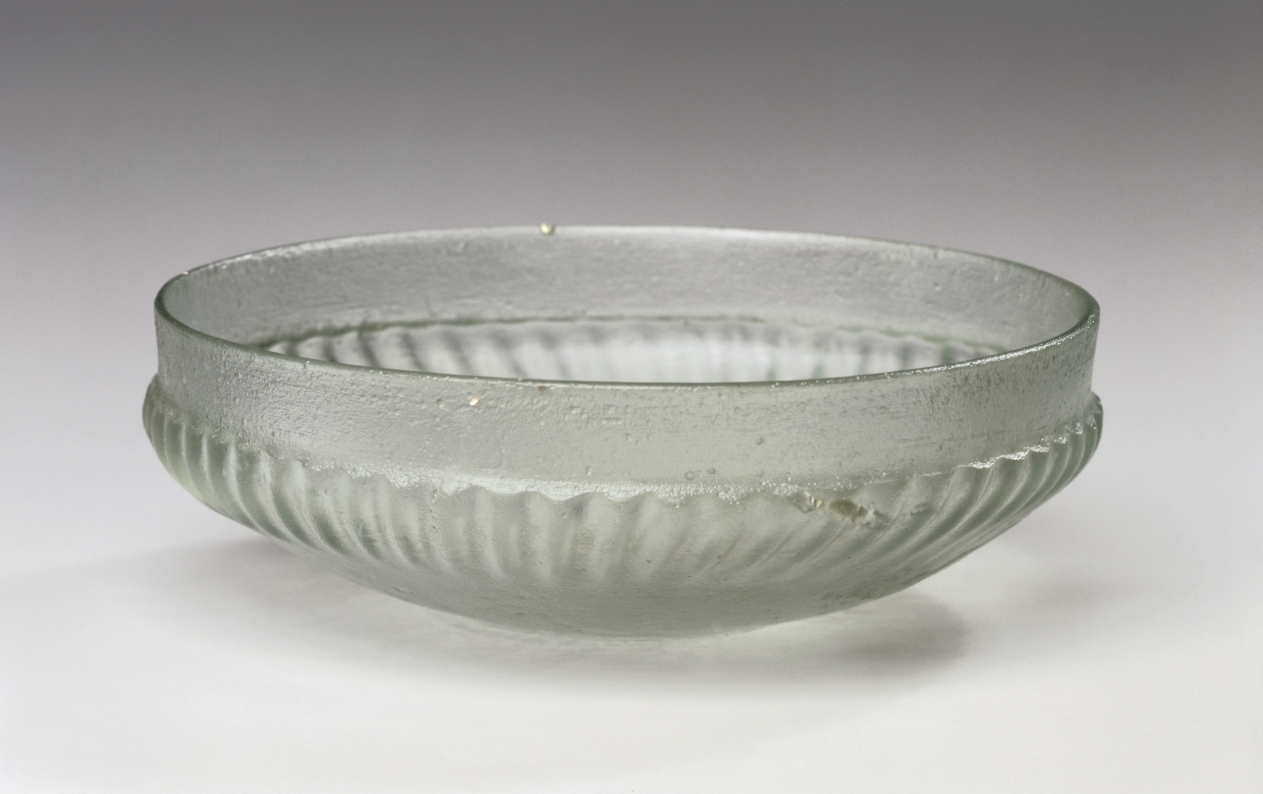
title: Shallow Ribbed Bowl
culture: Roman, Eastern Mediterranean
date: 50 BCE–100 CE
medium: glass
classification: Glass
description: Shallow ribbed glass bowls, often light blue, green, or turquoise in color, are a fairly common ancient glass vessel type. They were likely made by blowing or pressing molten glass into molds, sometimes leaving visible air bubbles within the glass matrix. After cooling, an artisan would rotate the bowl on a wheel or lathe, using a gentle abrasive to smooth out imperfections.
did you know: Shallow ribbed bowls could have multiple uses: eating, drinking, libations, and more.